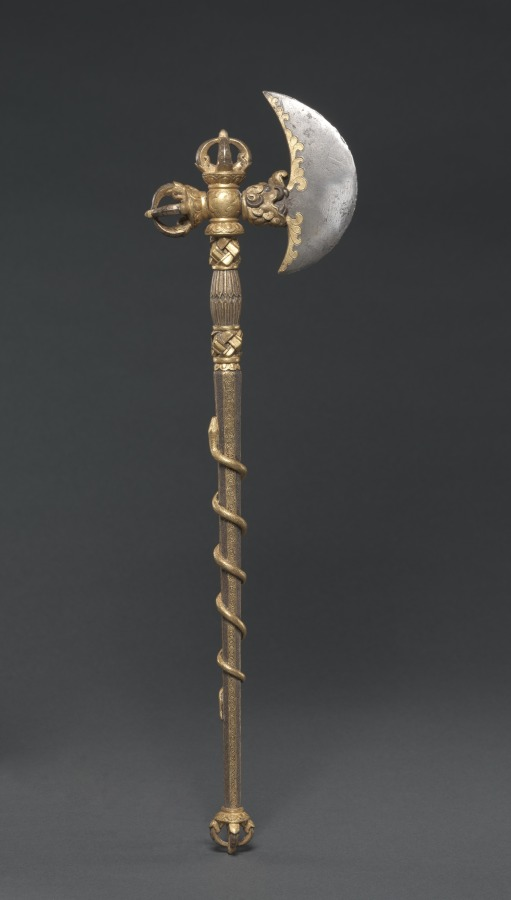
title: Ritual Weapons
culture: Sino-Tibetan, Derge School, Yongle period (1403-1427)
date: early 1400s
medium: iron alloy with gold and silver inlay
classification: Metalwork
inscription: Inlaid "Yung-lo" mark (1403-1425) in gold at tope of handle above snake's head.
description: Ceremonial weaponry was used in tantric rituals to combat obstacles to enlightenment, such as ignorance, delusions, and selfishness. In 1407 a high-ranking Tibetan monastic patriarch visited the emperor of the Ming dynasty, known as Yongle. The Yongle emperor presented him with a number of gifts, of which these implements were probably a component, since the axe bears his identifying inscription in a cartouche. Imperial Chinese workmanship is noted in the lush rendering of the lion heads from which the blades emerge, the calligraphic serpentine forms, and the cloud motifs.